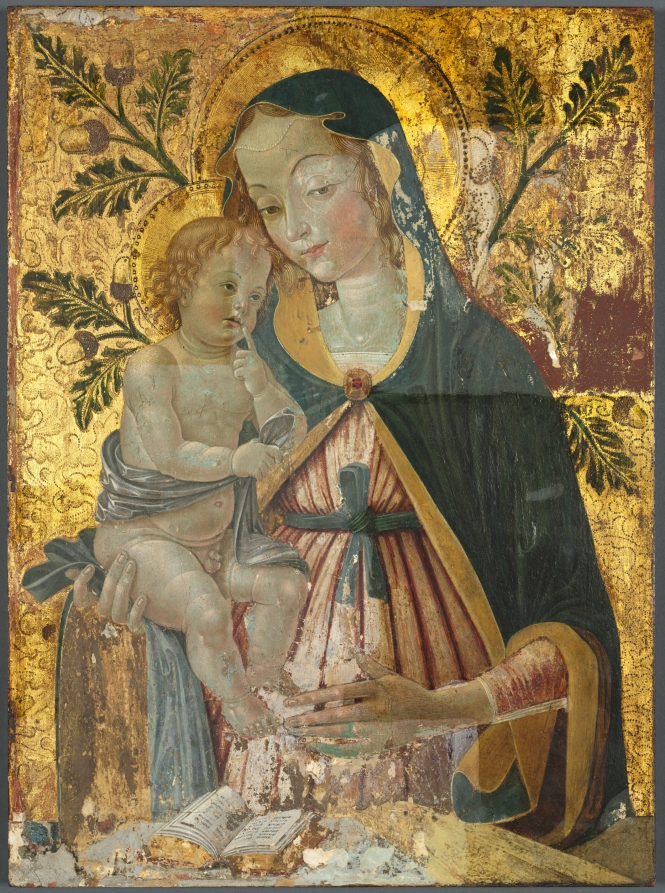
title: Virgin and Child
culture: Italy, Umbria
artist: circle of Fiorenzo di Lorenzo (Italian)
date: c. 1500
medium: tempera and gold on wood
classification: Painting